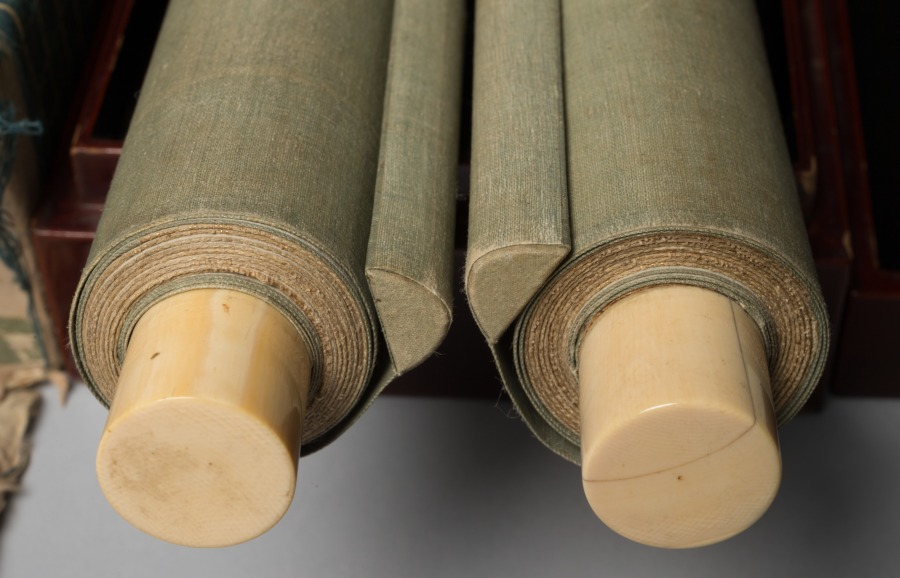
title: Fish and Rock; Fish and Seaweed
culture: Japan, Momoyama period (1573–1615)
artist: Rinkyo (Japanese)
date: 1573–1615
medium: pair of hanging scrolls; ink on paper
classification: Painting